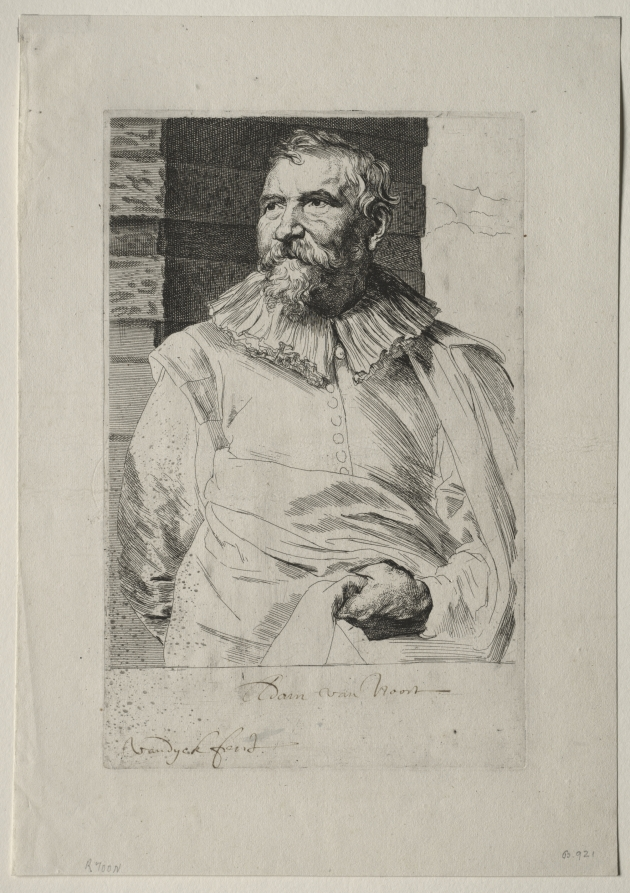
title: Adam van Noort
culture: Flanders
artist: Anthony van Dyck (Flemish, 1599–1641)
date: 1630–33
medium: etching and engraving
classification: Print